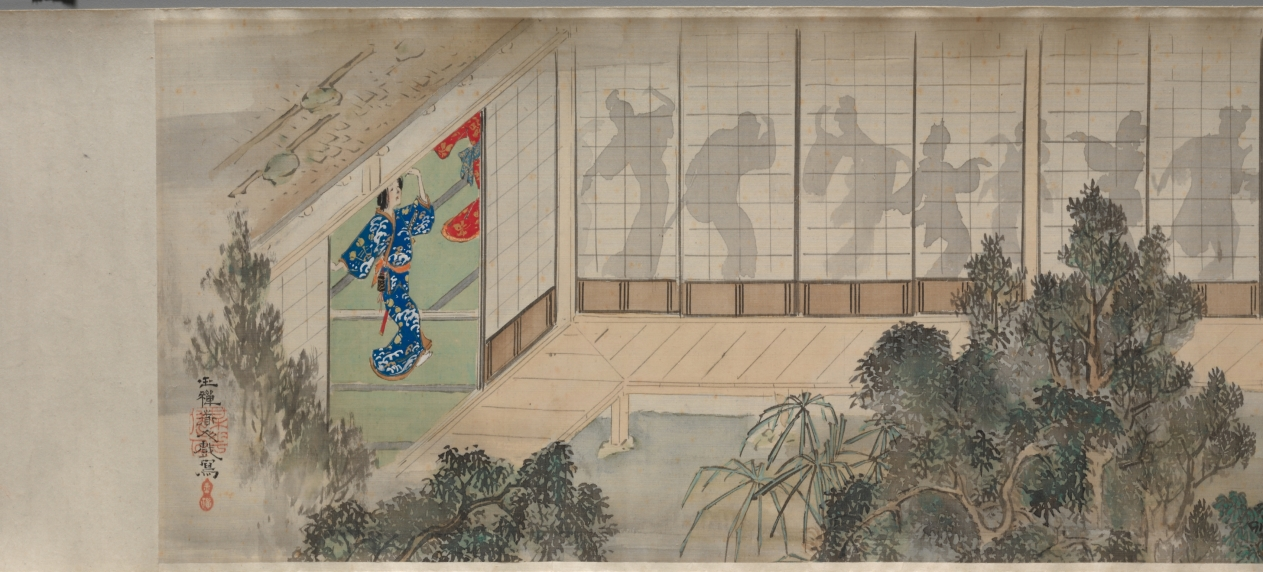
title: The Shadow Dancers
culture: Japan, Edo period (1615–1868)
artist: Yamamoto Baiitsu (Japanese, 1783–1856)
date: 1800s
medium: handscroll, ink and color on silk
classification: Painting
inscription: artist's signature and two seals at end of painting.